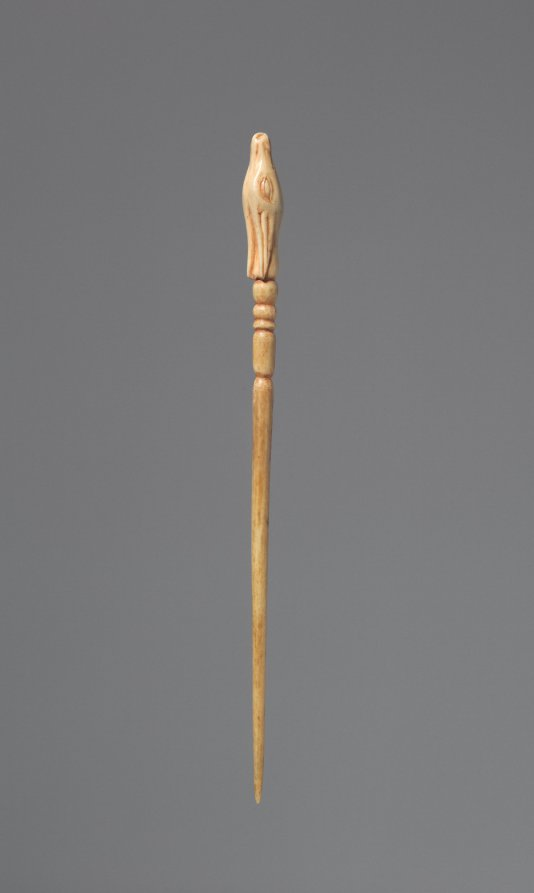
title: Hairpin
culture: Greece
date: 500–450 BCE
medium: ivory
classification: Ivory